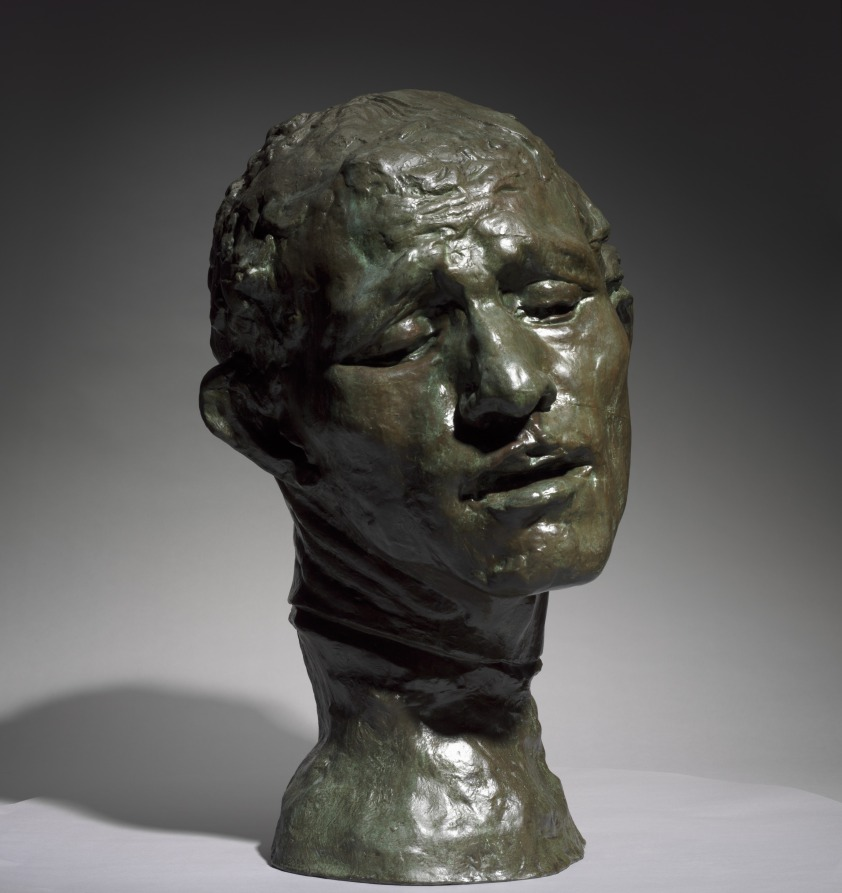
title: Heroic Head of Pierre de Wissant, One of the Burghers of Calais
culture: France, 19th century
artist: Auguste Rodin (French, 1840–1917)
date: 1886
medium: bronze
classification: Sculpture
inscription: inscribed at neck, left: A.Rodin; inscribed lower back: Alexis Rudier/Fondeur-Paris.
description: This sculpture depicts one of the figures in Rodin’s large public monument The Burghers of Calais (1884–89), featuring six French men who volunteered to be taken prisoner by the English in exchange for lifting the siege of Calais during the Hundred Years War (1337–1453). Pierre de Wissant’s anguished expression suggests extreme mental suffering as he contemplates his expected execution. Rodin exhibited a life-size version of the figure as an independent work before completing the monument. He later made multiple versions in various sizes and media.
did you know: This sculpture depicts the head of a figure from Rodin's large public monument The Burghers of Calais (1884-89). The CMA also owns a plaster version of the head.